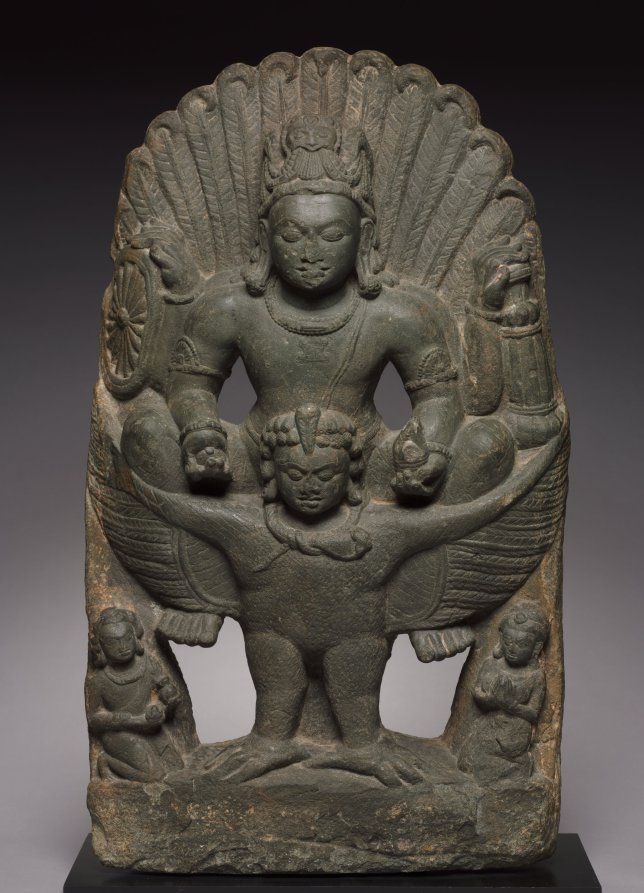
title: Vishnu Riding on Garuda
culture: Eastern India, Bihar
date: 300s CE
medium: schist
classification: Sculpture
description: In a rare and powerful work from this period, Vishnu straddles his vehicle, the man-eagle called Garuda, here shown with a human head, wings outstretched, and tail feathers expanding like rays of light behind the head of the god. Garuda is the enemy of serpents, and a subjugated serpent is tied around his neck. His determined expression lends confidence that he will do anything in his power to support Vishnu in his accomplishments. Tiny worshippers kneel in veneration before the imposing figures. Each of Vishnu's hands holds an implement: discus, mace, conch, and citron fruit. On his chest is an auspicious symbol called the shrivatsa, or "child" (vatsa) of Shri, the goddess of good fortune and a wife of Vishnu.